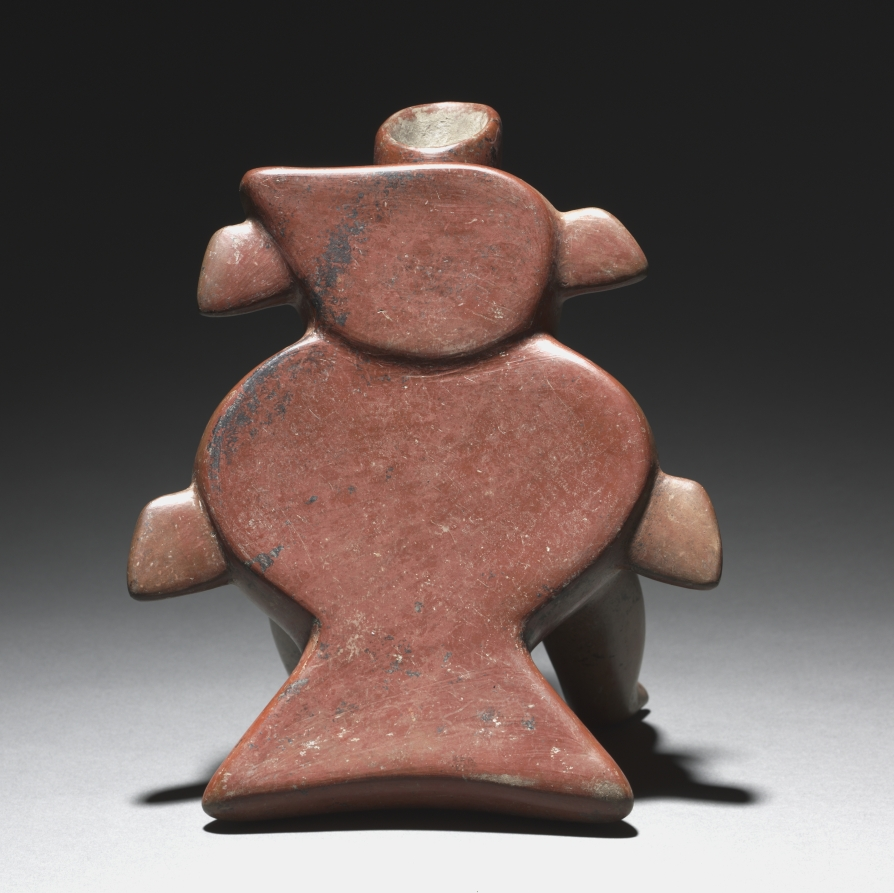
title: Recliner-shaped Vessel (Reclinatorio)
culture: West Mexico, Colima state, Comala style, Formative period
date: 200 BCE–300 CE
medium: ceramic and slip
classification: Ceramic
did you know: This vessel represents a major type of Colima pottery.